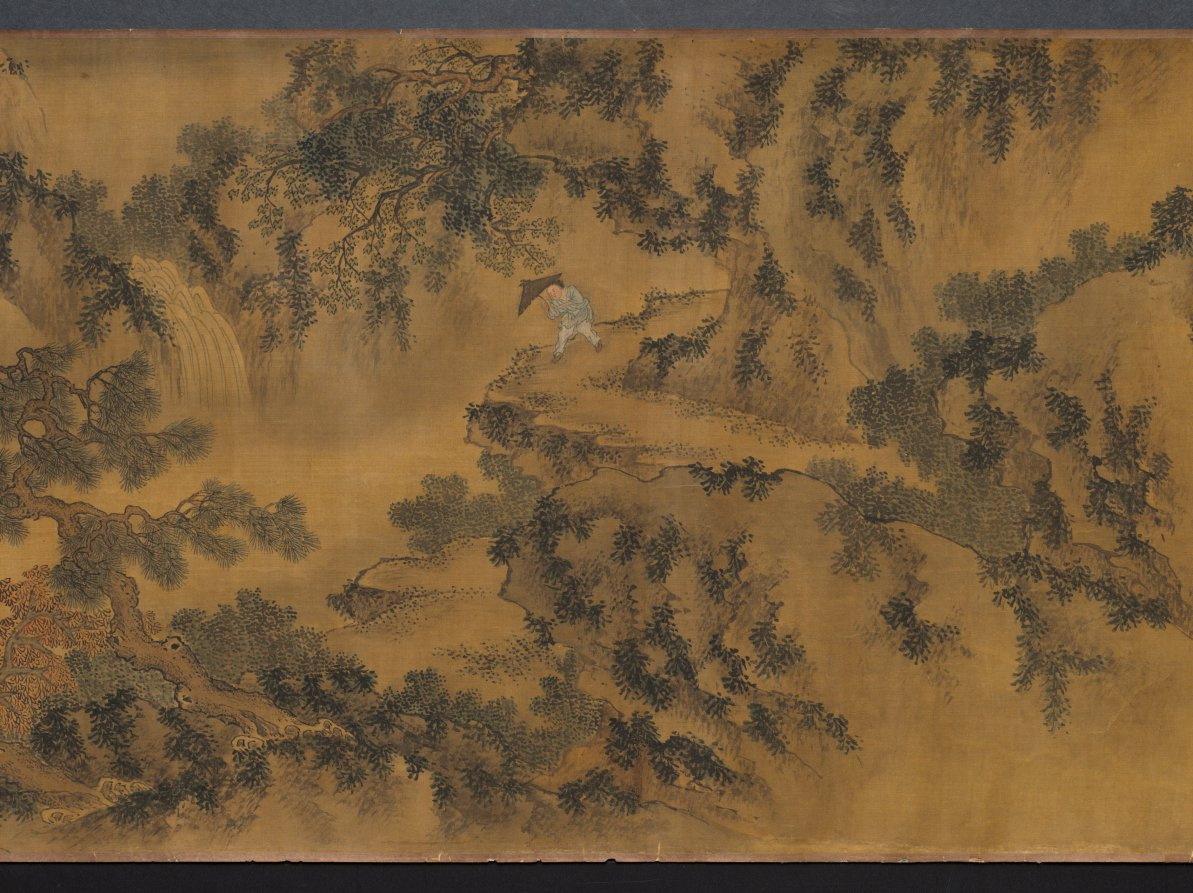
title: Returning to the Village in a Rainstorm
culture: China, Ming dynasty (1368–1644)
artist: Xie Shichen (Chinese, 1487–after 1567)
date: 1530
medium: Handscroll; ink and light color on silk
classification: Painting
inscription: 風雨歸村圖 嘉靖庚寅秋日樗仙謝時臣. [印] 謝時臣印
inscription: 3 additional seals unidentified.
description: This scroll depicts a wind- and rainswept landscape with figures in the countryside struggling against a late summer monsoon rainstorm. Such weather was familiar to residents of the lower Yangzi delta. Xie Shichen spent most of his life in the Suzhou area. Details of his career are scant, but his surviving works suggest that he made his living as a professional painter. This painting conveys drama and anecdotal observations, characteristic of Zhe school paintings, such as the one by Lü Wenying, CMA 1970.76.